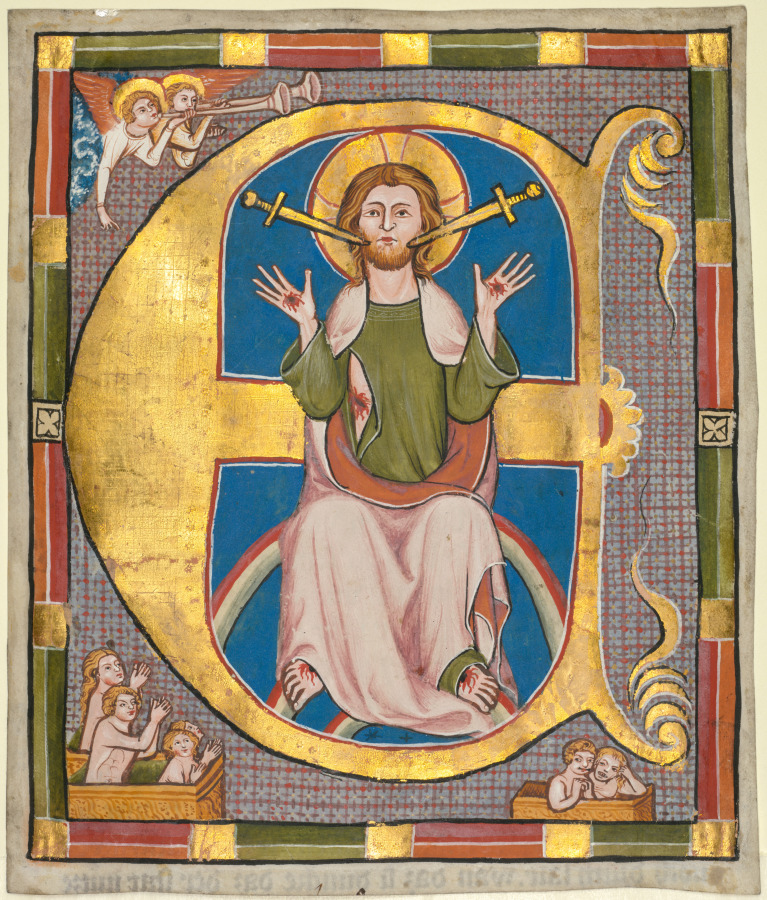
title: Initial E from a Municipal Law Book: The Last Judgment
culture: Germany, Regensburg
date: c. 1330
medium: ink, tempera, and gold on parchment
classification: Manuscript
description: This initial E serves as a frame for the figure of Christ, shown here as the judge of the world with the swords of justice emanating from his mouth. Above, two angels emerge from the heavenly realm to announce the final judgment of humankind, while below, the dead rise from their graves. The image provides a visual message of justice, retribution, and accountability, and shows the connection between secular and religious themes during the Middle Ages. Regensburg on the Danube, one of the most important cities in southern Germany in the Middle Ages, was also affected by the plague, although little is known about it from written sources.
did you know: Christ sits on a tricolored rainbow, the three colors symbolize the Trinity: the father, the son (Jesus Christ), and the holy spirit.